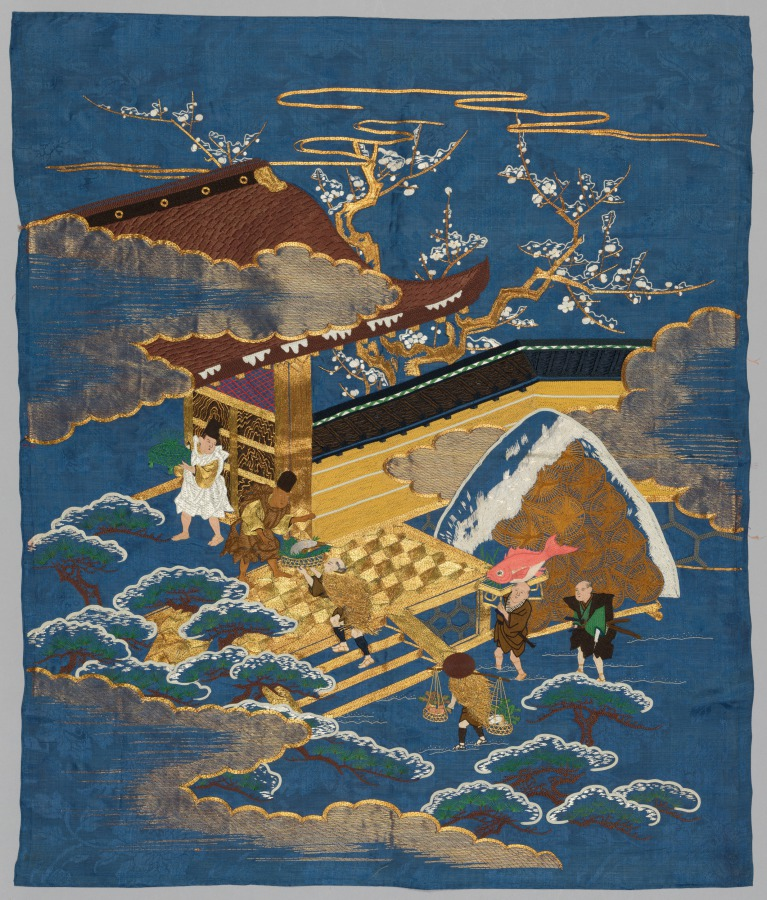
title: Embroidered Fukusa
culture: Japan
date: late 1800s-early 1900s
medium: embroidered silk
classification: Embroidery